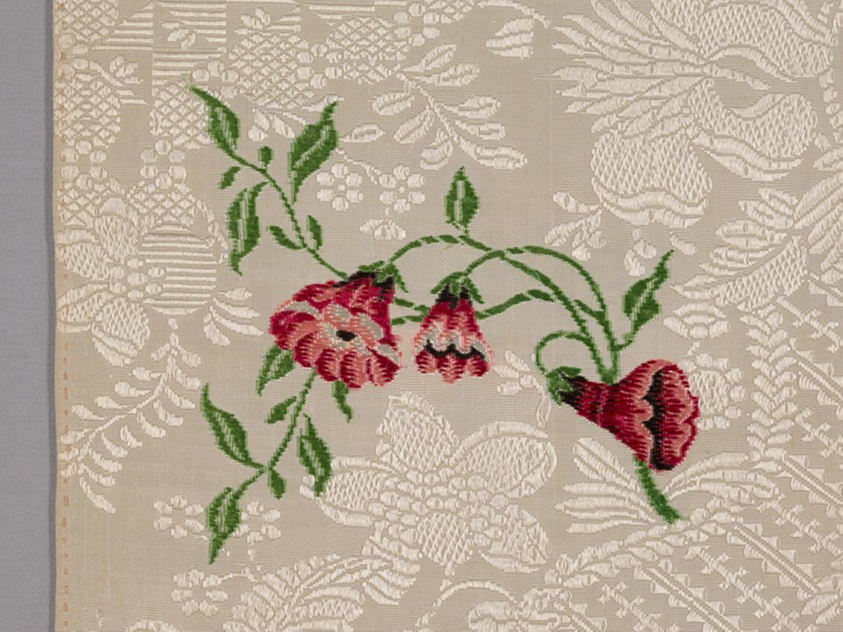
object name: Costume and Accessories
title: Skirt Panel for a Woman's Sack Gown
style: 18th Century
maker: Designed by Anna Maria Garthwaite (English, 1690–1763); Woven by Daniel Vautier (English, active 1741–51); Spitalfields, England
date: Design March 1, 1749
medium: Silk, plain weave foundation with supplementary patterning warps and supplementary brocading wefts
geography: England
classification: garment; weaving; textile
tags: flowers, foliage, floral motifs, vines, botanical/floral